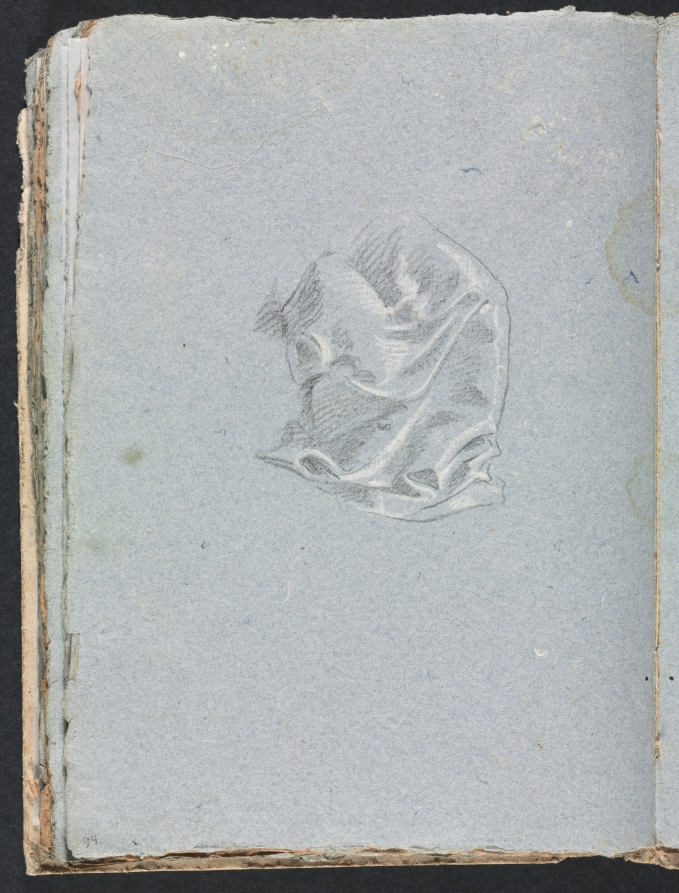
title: Verona Sketchbook: Drapery study (page 94)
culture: Italy, 18th century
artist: Francesco Lorenzi (Italian, 1723–1787)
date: 1760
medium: black chalk with white heightening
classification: Bound Volume